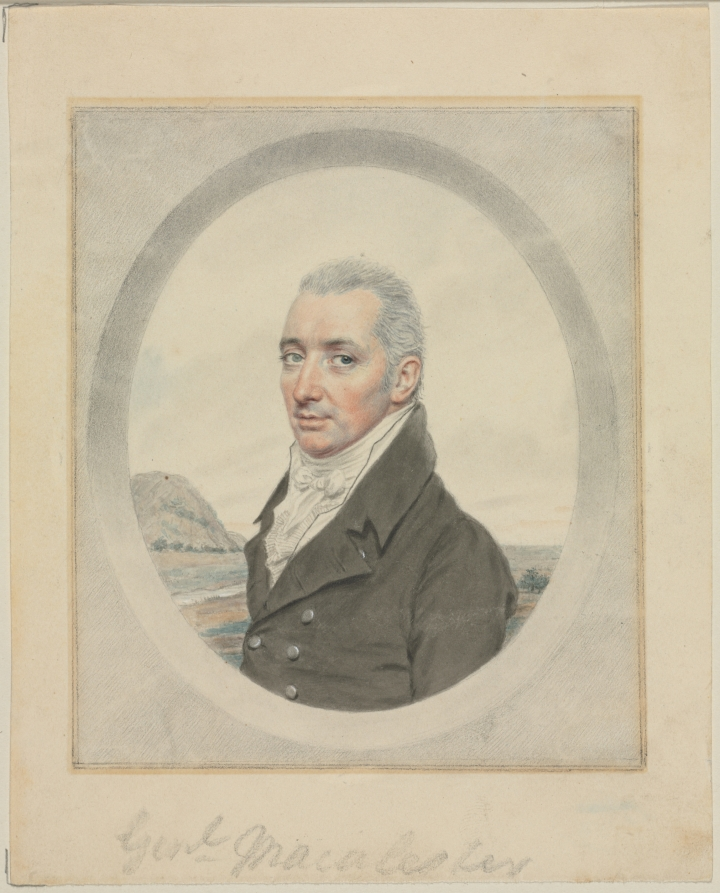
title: Portrait of General Keith MacAlister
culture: England, 18th century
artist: John I Smart (British, 1741–1811)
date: c. 1800–1810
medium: watercolor and graphite, heightened with traces of white gouache, on paper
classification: Portrait Miniature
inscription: across bottom, in graphite: Genl Macalester ; VERSO, center, in graphite: 169; lower left, in graphite: l. 159. [circled]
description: Although it is impossible to say if it was always part of the artist’s process to execute a preparatory sketch prior to painting each miniature, we do know that John Smart retained many hundreds of these sketches. A great number were inherited by his son John James Smart, who in turn left them to his daughter Mary Ann Bose. Upon her death in 1934, they were divided between three of her children: William Henry Bose, Lilian Dyer, and Mabel Annie Busteed. General MacAlister is represented in three-quarter view, bust length, and facing the right. His eyes are blue, but the right eye is clouded and lighter in color than the left. There is no sign of isolated damage or fading, confirming that this color difference was among MacAlister’s physical attributes. He wears a brown coat; white, frilled vest edged in black; tall collar; and a white cravat tied in a bow. His closely cropped hair is powdered, and an unidentified rocky landscape through which a small river runs is painted in the background; it probably represents a place of personal significance in Scotland or India, possibly even Seringapatam and the Cauvery River. Smart depicted MacAlister inside of a penciled oval tromp l’oeil frame. The drawing is replete with physically informative details and is larger and more finished than drawings intended to function exclusively as preparatory sketches, though it may also have served this purpose. Beneath the elaborate penciled border is written in large graphite script “Genl Macalester.” This inscription is not in the artist’s hand and almost certainly a later addition. A Colnaghi label was removed from the verso after the work entered the museum’s collection. The sitter is likely Major-General Keith MacAlister (1746–1820) of the Madras Cavalry. He was the eldest of three soldier brothers who served with distinction in India. MacAlister was born at Skerrinish in the Isle of Skye and ascended through the ranks rapidly following his appointment as cadet in 1777. He became captain in 1796; lieutenant-colonel in 1799; colonel in 1809; and major-general in 1812. He is celebrated particularly for his role in the 1799 storming and capture of Seringapatam, a decisive battleground in the Fourth Anglo-Mysore War, and for rescuing his brother Matthew from a long imprisonment in the same city. MacAlister was also instrumental in organizing the Madras Light Cavalry.5 Smart’s portrait of MacAlister would have been painted between 1800 and 1810, when the sitter was an older man and had returned to England before settling in Scotland. The Nelson-Atkins Museum of Art owns a Smart portrait on ivory called Keith Michael Alexander, dated 1810. Although he wears a military uniform rather than civilian clothes, the sitter is identical to the one in the Cleveland drawing—note in particular the differently colored eyes and the blue veins at the left temple. Although it was painted in 1810, possibly some years after the Cleveland sketch, the sitter’s hair loss is more pronounced in the earlier drawing. This inconsistency can be explained by the fact that Regency fashion called for men to comb their hair forward, thereby obscuring baldness, as seen here. Otherwise, the portraits are so similar that it is likely that Smart was consulting the earlier finished drawing when executing the 1810 miniature in ivory. Both “General Macalister” and “Colonel Keith Michael Alexander” are listed by Daphne Foskett among Smart’s sitters, but she reproduces images only of the latter Nelson-Atkins miniature. No additional portraits of the period depicting gentlemen of either name have been discovered at this time. The Nelson-Atkins ivory has been called Keith Michael Alexander by tradition at least since it was in the Mr. and Mrs. John W. Starr collection before entering the museum in 1958. However, the miniature has not been removed from the frame since its acquisition, and there is no evidence of an inscription. It is likely that Keith Michael Alexander is a mistaken interpretation of the name Keith MacAlister, particularly because no record of a soldier by the name of Keith Michael Alexander has been discovered.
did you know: Sketches helped John Smart work out the particulars of a portrait before commencing the miniature on ivory; they were useful in the event that a duplicate might later be required.